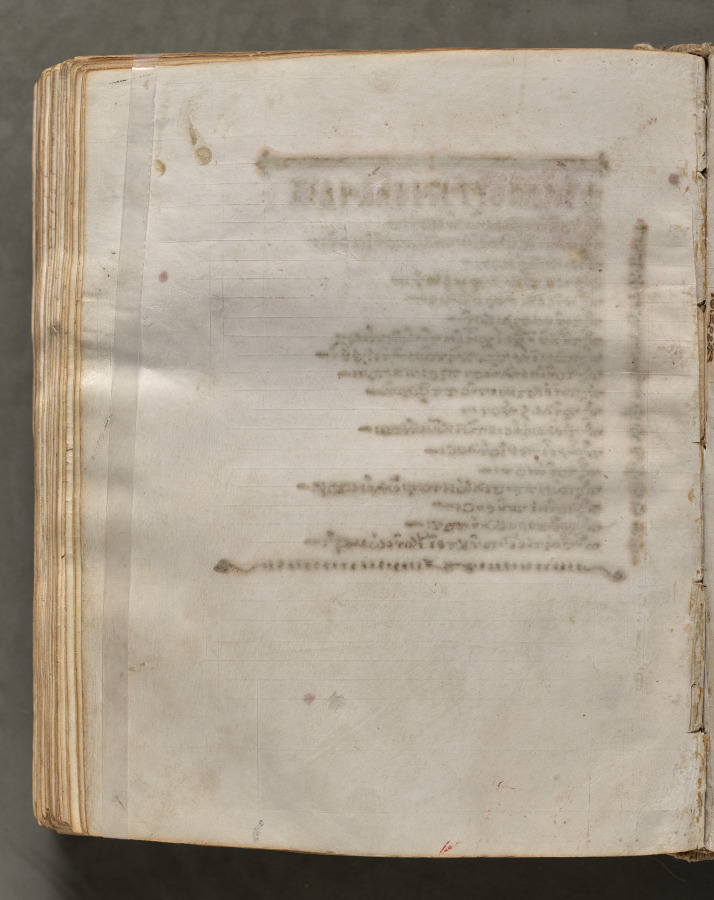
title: Text, folio 323 (verso), from a Gospel Book with Commentaries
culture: Byzantium, Constantinople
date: c. 1000–1100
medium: ink, tempera, and gold on vellum; leather binding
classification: Bound Volume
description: Each of the four gospels in this book opens on a page with brilliantly illuminated borders depicting the author of the text as well as birds—principally peacocks, symbols of the immortality of the soul—and fountains, representing the fountain of life and the salvation of the soul. This volume consists of 428 leaves with texts in Greek. Its level of sophistication suggests that it was probably written and decorated in a monastery in Constantinople.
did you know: Gospel books were carried in procession through Byzantine churches.